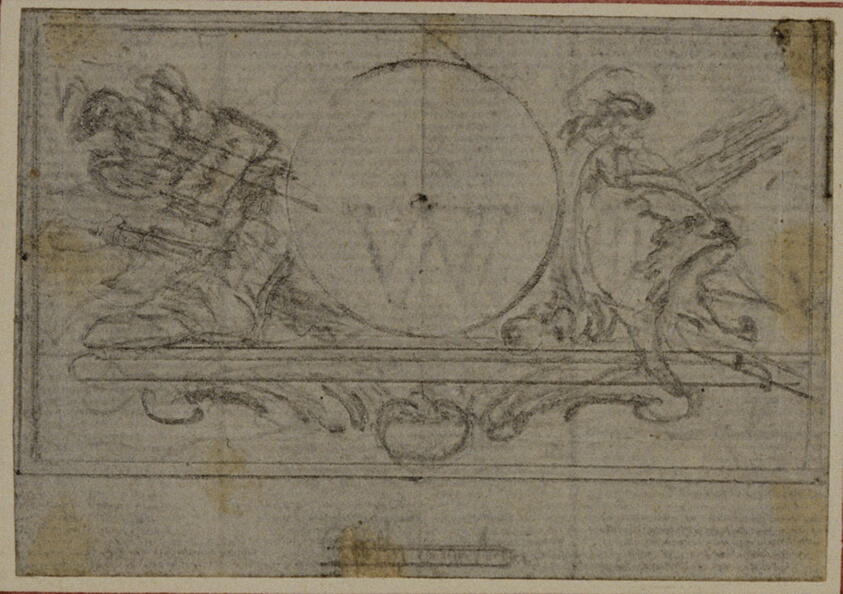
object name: Drawing and Watercolor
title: Study for En Tête Vignette in Tacitus "Tibère, ou Les Six Premiers Livres des Annales", Book VI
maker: Hubert François Gravelot (French, 1699-1773)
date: c. 1768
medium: Graphite, on gray laid paper, incised for transfer and perimeter mounted on ivory laid paper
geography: France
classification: graphite; drawings (visual works); prints and drawing